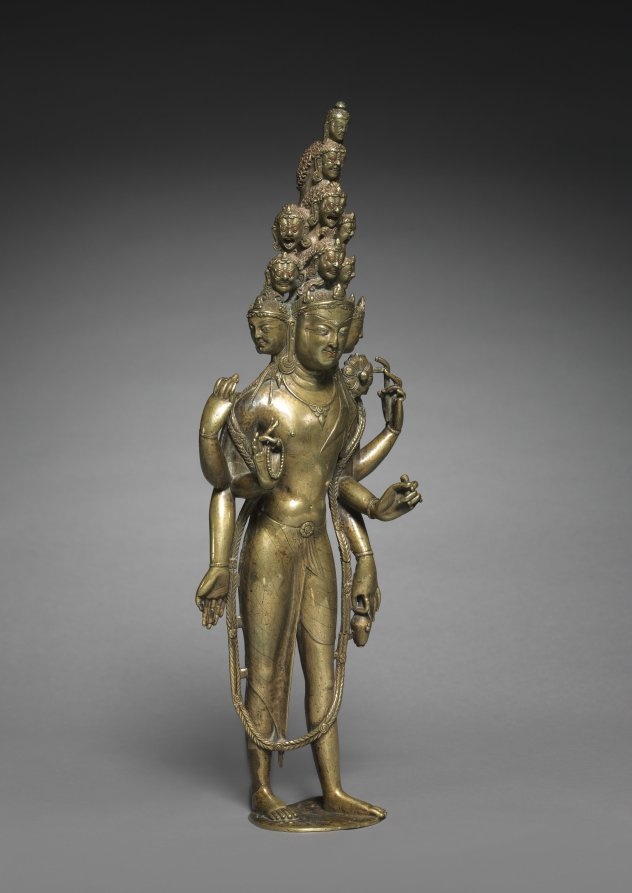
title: Eleven-Headed Bodhisattva of Compassion (Avalokiteshvara)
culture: Western Himalayas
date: around 1000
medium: gilt bronze with silver and copper inlay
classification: Sculpture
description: One of the finest surviving examples of its kind, this rare six-armed form of Avalokiteshvara has the slender athletic figure and penetrating expression associated with the art of Kashmir, the main source for western Tibetan styles. This Bodhisattva combines the qualities of a prince and an ascetic, with his crown and jewels combined with the yogi's antelope skin over his left shoulder and prayer beads in his middle right hand. Representing the range of Avalokiteshvara's forms and aspects, his eleven heads are remarkably articulated with individualized features. They follow textual descriptions that describe his three placid faces, three fierce faces, three terrifying howling faces, and one laughing face, all surmounted by a head of the Buddha Amitabha, with whom he is closely associated. Tongues and lips have been inlaid with copper to extraordinary effect, and a miniature seated figure of Amitabha Buddha has been placed in the center of every crown.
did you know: The bottle in his lower-left hand contains the nectar of immortality.